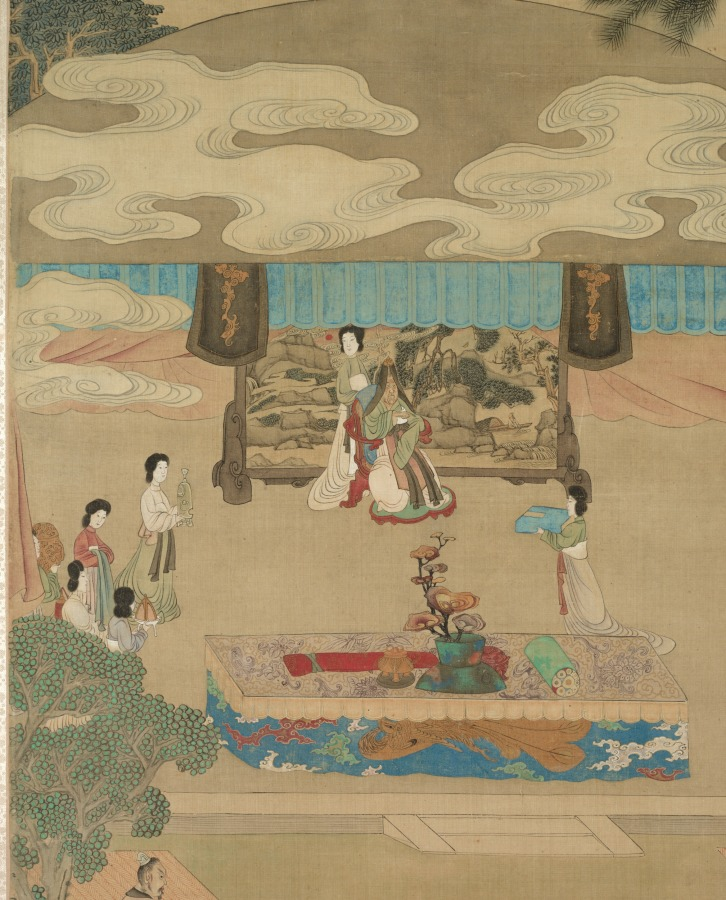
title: Lady Xuanwen Giving Instruction on the Rites of Zhou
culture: China, Ming dynasty (1368–1644)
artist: Chen Hongshou (Chinese, 1598/99–1652)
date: 1638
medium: Hanging scroll; ink and color on silk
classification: Painting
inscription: 宣文君者韋逞母宋氏也。父授以周官音義，曰：吾家世學傳周官。傳業相繼。此又周公所製，經紀〔典〕誥百官品物備於此矣。女可受之。君諷誦不輟。石帝徙山東。君乃推鹿車，背負父所授書到冀州。逞時年少。晝則採樵，夜則教逞。逞遂學成名立。仕符堅為太常。堅常幸其太學，問博士經典。乃憫禮樂遺缺。時博士盧壺對曰：廢學既久，書傳零落。比年綴撰，正經粗集。惟周官、禮經，未有其師。竊見太常韋逞母宋氏世學家，女傳其父業。得周官音義。今年八十。視聽無闕。非此母無可傳授後生。于是就宋氏家立講堂，置生員百二十人。隔絳紗縵而授業焉。拜宋氏爵，號為宣文君。賜侍婢十人。周官學後行于世。 崇禎戊寅八月二日，為綬姑六旬之辰。綬弟自成為姑偦。偕姑季女駱密、外孫楹、楠、楩、橒、楞、棅、孫女惠、漉酒上壽，屬綬圖寫，所以頌祝者。綬思宋母尚五胡之時，經藉屬之婦人；今太平有象，而秉杖名義者，獨綬姑爾。敬寫此圖，且厚望于弟紹焉。猶子洪綬九頓首。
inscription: 5 additional seals: 2 of Xu Weiren 徐渭仁(1788－1855); 2 of Sun Zutong 孫祖同 (1894–1937); 1 of C. C. Wang 王季遷 (1907–2003).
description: This painting by Chen Hongshou depicts the story of Xuanwen Jun, or Lady of Literary Propagation, at a venerable age, instructing young scholars on the Confucian classics. It was painted for Chen’s aunt in celebration of her 60th birthday. Chen’s painting style is archaic in the use of fine outlines and brilliant coloring with mineral pigments. In depicting the figures, he uses the “iron-wire” brush style (fine, even lines) with deliberate control. The faces are elongated and exaggerated. A few ritual bronzes lend the scene an antique flavor.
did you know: Chen Hongshou's long inscription at the top of the painting compares his virtuous aunt with the historical exemplar, Lady Xuanwen.